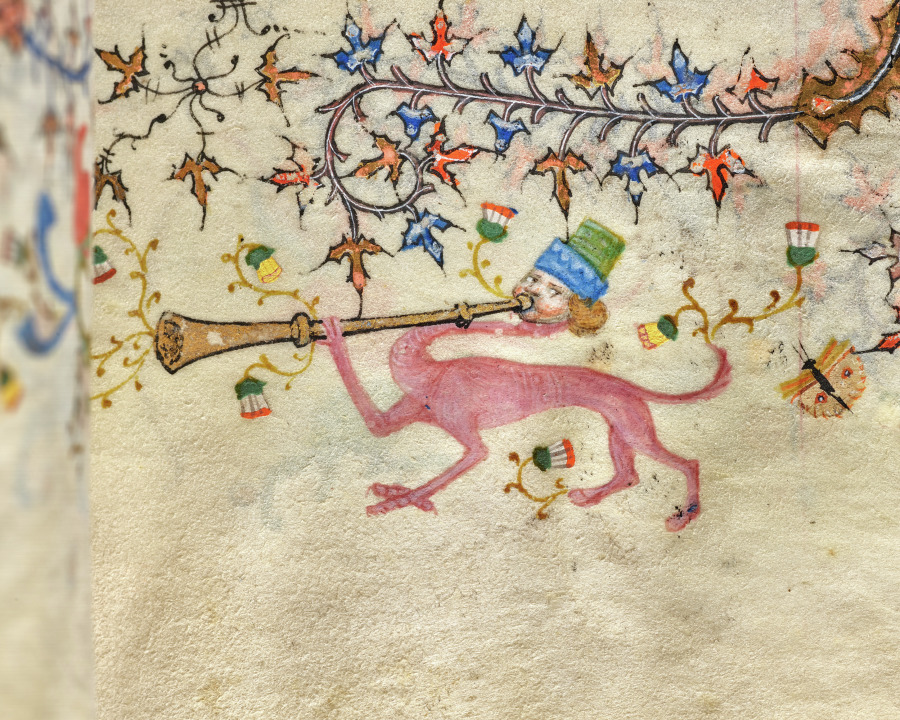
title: Hours of Charles the Noble, King of Navarre (1361-1425): fol. 219r, Text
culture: France, Paris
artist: Master of the Brussels Initials and Associates (French)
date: c. 1405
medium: ink, tempera, and gold on vellum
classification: Bound Volume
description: This precious volume was obviously highly prized by its owner, the French-born King of Navarre, who had his coat of arms painted on no less than twenty folios. Rather than directly commissioning this manuscript from a specific workshop, it seems that Charles the Noble acquired his book of hours -- perhaps ready-made for the luxury market -- while on a trip to Paris in 1404-05. A collaborative effort, six painting styles are evidenced within the pages of this codex, those of two Italians, two Frenchmen, and two Netherlanders. The painter who was responsible for the planning and decoration of the book, and who produced seventeen of the large miniatures, was a Bolognese artist known as the Master of the Brussels Initials. His principal assistant, responsible for most of the borders, was a Florentine who signed his name "Zecho" da Firenze on folio 208 verso.